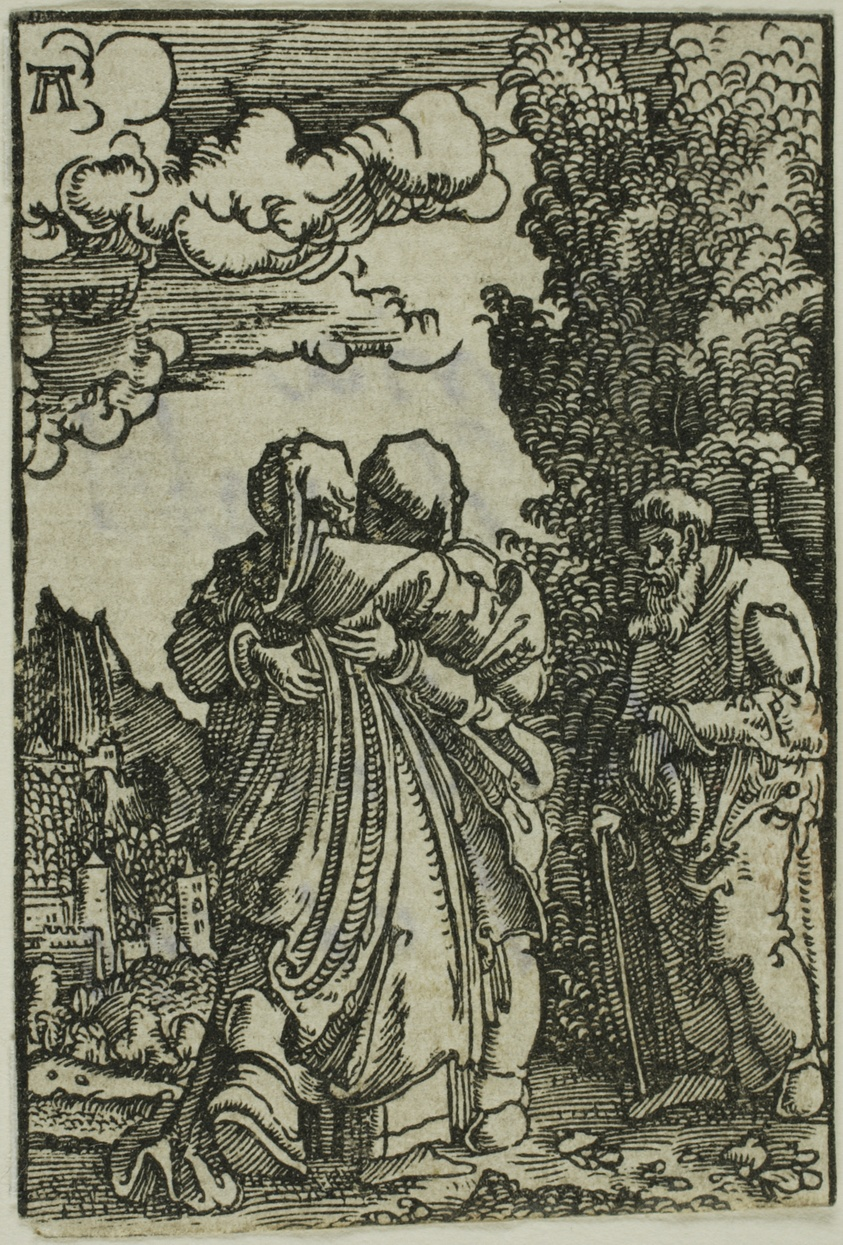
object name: Print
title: The Visitation, from The Fall and Redemption of Man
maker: Albrecht Altdorfer (German, c.1480-1538)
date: 1513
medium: Woodcut in black on ivory laid paper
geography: Germany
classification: wood engraving; print; prints and drawing